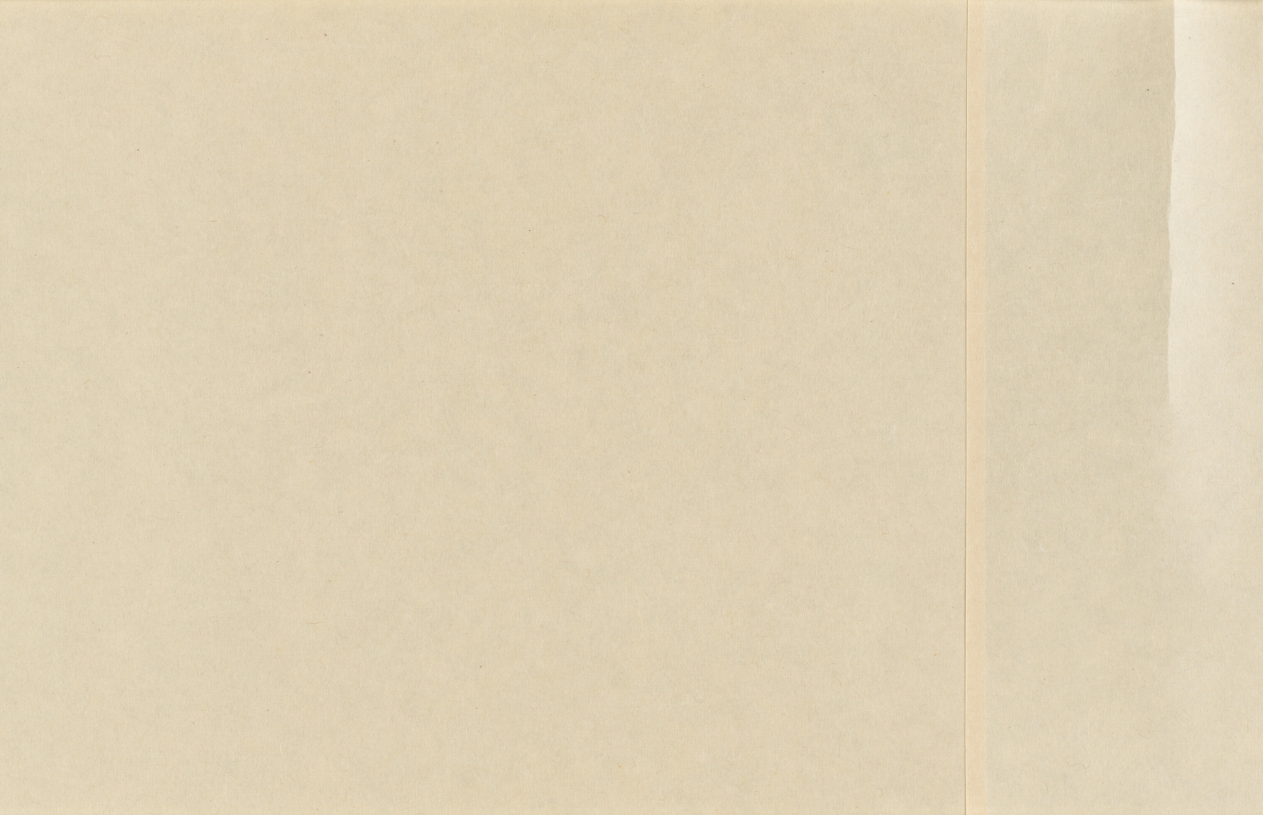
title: Eight Views of Xiao-Xiang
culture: Japan, Muromachi period (1392–1573)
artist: Sesson Shūkei (Japanese, c. 1492–c. 1577)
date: 1500s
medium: handscroll; ink on paper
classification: Painting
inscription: Signature and seal of artist at end of painting.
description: Eight Views of the Xiao and Xiang Rivers can be traced to 11th-century Chinese poems and paintings, the depiction of which had also become popular among Korean and Japanese painters. Xiao-Xiang refers to the region in present-day Hunan province where the Xiao and Xiang rivers converge. Few painters of the Eight Views had in fact seen the scenery; rather, they were trying to portray in ink and wash the lyrical qualities of dim light and a misty atmosphere typical of that region. Each of the poetic titles suggests a time of day, a season, or specific atmospheric conditions—subjects that challenged the abilities of the most talented artists. In this miniature painting (shukuzu) of the Muromachi period, Japanese Zen monk and painter Shukei Sesson depicted all eight views featured in Chinese prototypes: Wild Geese Descending to Sandbar; Returning Sails Off a Distant Coast; Mountain Market in Clearing Mist; River and Sky in Evening Snow; Autumn Moon over Dongting Lake; Night Rain on the Xiao and Xiang; Evening Bell from Mist-Shrouded Temple; and Fishing Village in Evening Glow.